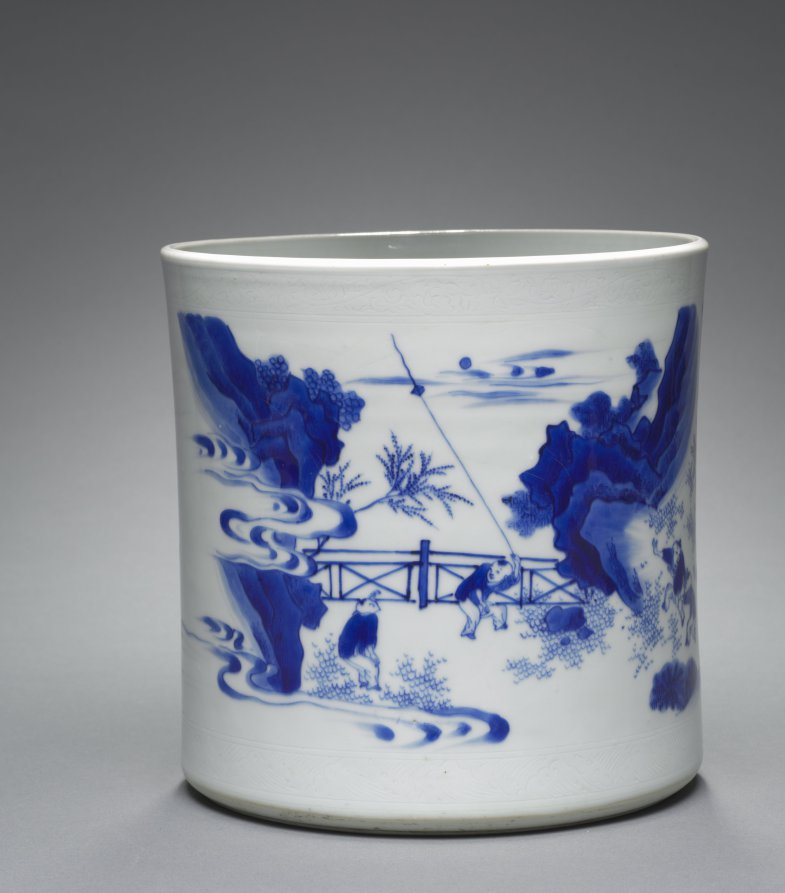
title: Brush Pot with Episode from Life on Sima Guang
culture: China, Jiangxi Province, Jingdezhen, Qing dynasty, Shunzhi period (1644–61)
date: 1628–61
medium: porcelain with underglaze blue decoration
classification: Ceramic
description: Painted in a continuous scene around the cylindrical body is an episode from a folktale about Sima Guang (1019-86), a renowned Northern Song statesman and scholar who exercised quick thinking in his childhood when he broke a ceramic vat filled with water to rescue a drowning playmate